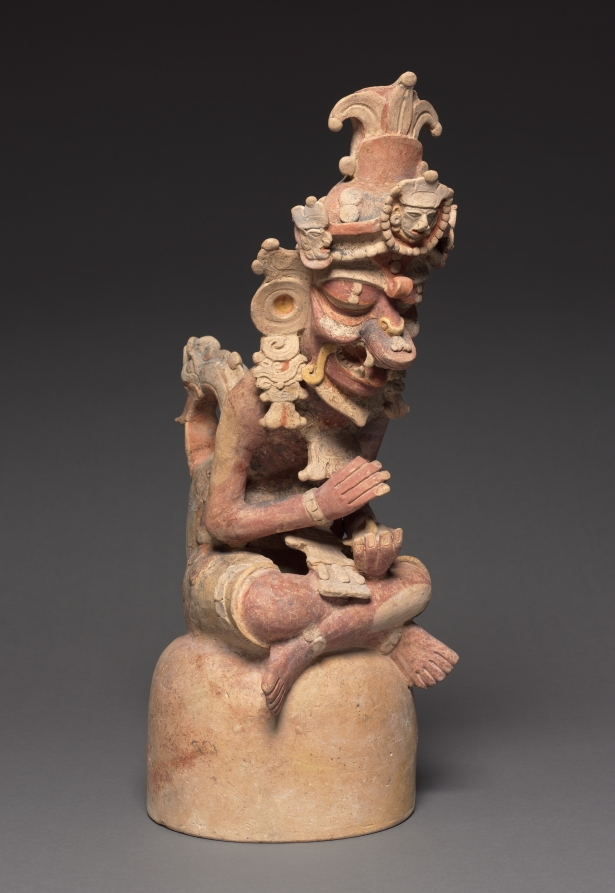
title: Artisan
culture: Guatemala, Petén region, Maya style (250-900), Maya style (250-900)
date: 250–600 CE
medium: earthenware with colored slips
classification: Sculpture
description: These figures represent the supernatural patrons of the visual arts and writing: the brothers Hun Batz and Hun Chuen ("One Monkey" and "One Artisan"). The two were refined artists but also bullies who tormented their younger brothers, who took revenge by transforming their elders into monkeys. Many Maya representations of the painter-scribes immortalize this fate by depicting the pair with both simian and human features, as here. The brothers are shown engaged in artistic or scribal pursuits. Sitting on high-domed bases that may have served as the lids of incense or offering bowls, each apparently once grasped a tool in his upper hand-for instance, a paint brush or a stylus for writing. In the lower hand, one cradles a small mask and the other, a piece of bark that likely refers to the beaten bark from which the Maya made books.